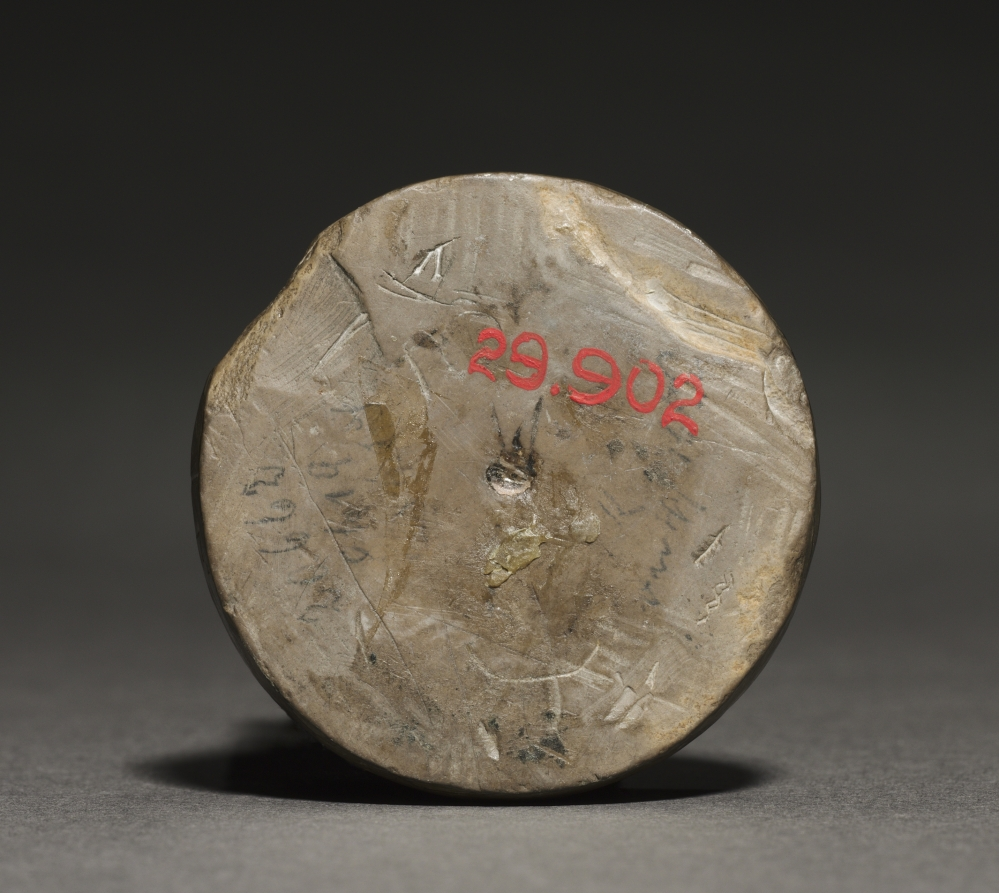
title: Portrait of a Woman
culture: Germany, Nuremberg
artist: Kilian Koch (German)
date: 1580–1600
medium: Kelheim stone (fine-grained limestone)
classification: Sculpture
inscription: inscription: DAS IST MEIN GROESTE PEIN DAS ICH NIT PIN DO ICH GERN WOLT SEIN ALT XVI IOR (It is my greatest sorrow that I am not, though I gladly would be, sixteen years old.)